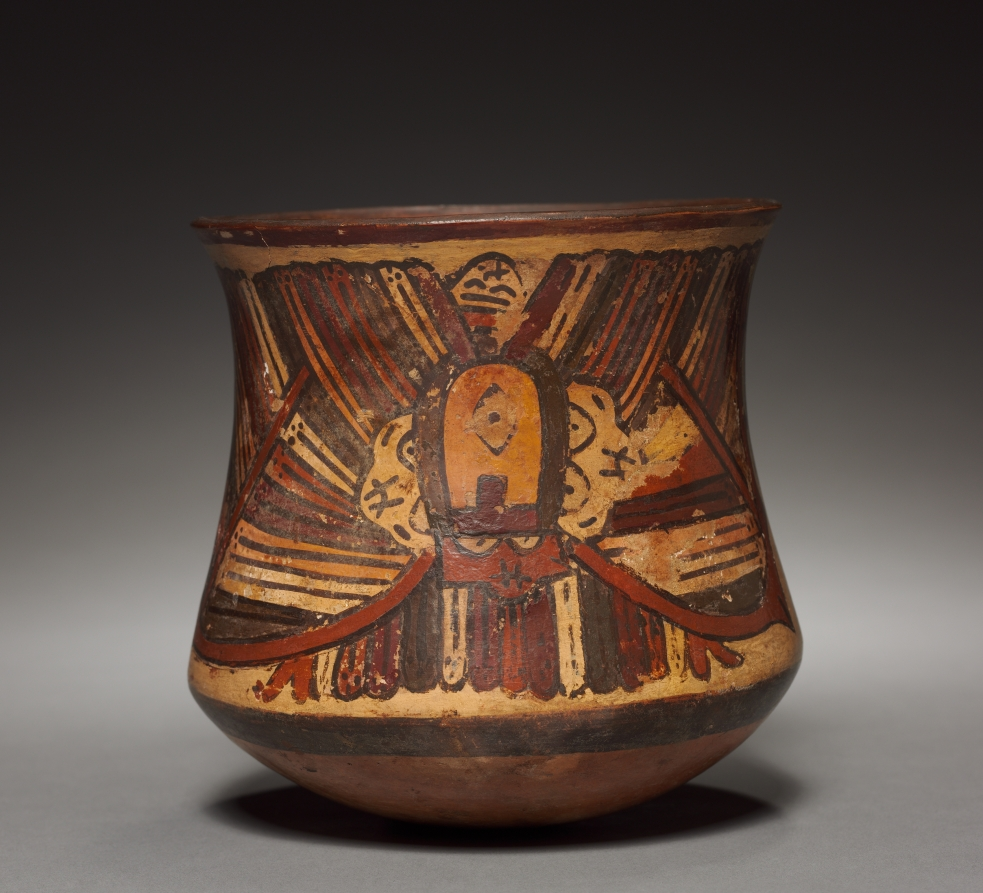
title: Vase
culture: Peru, South Coast, Nasca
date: 2000–20 BCE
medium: pottery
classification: Ceramic